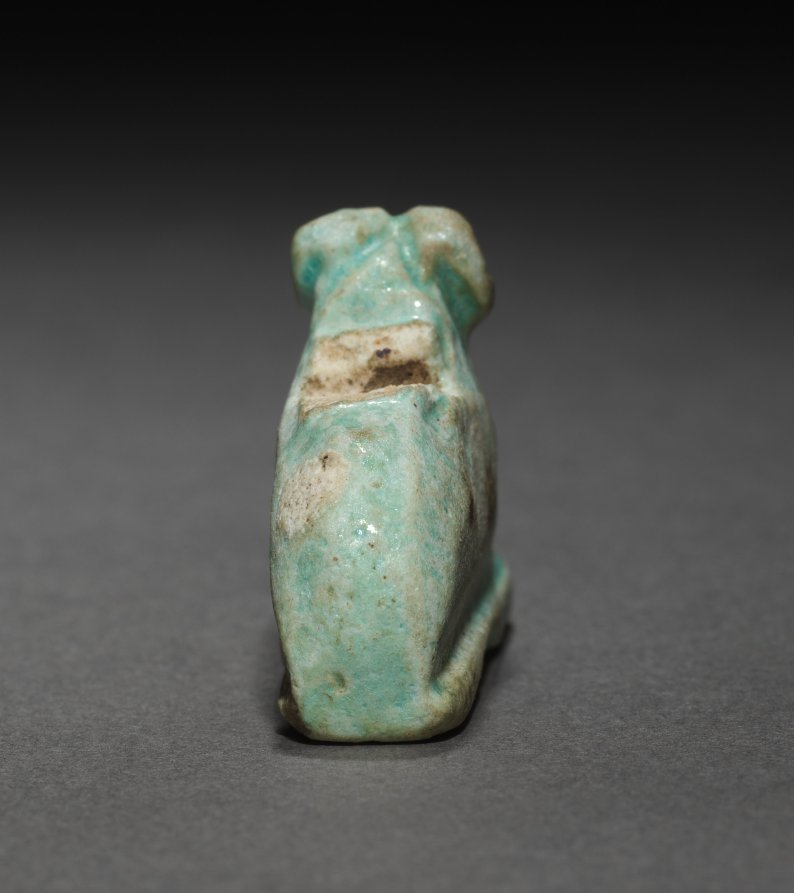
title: Ram Amulet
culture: Egypt, Greco-Roman period (332 BCE–395 CE), Ptolemaic dynasty (305–30 BCE)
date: 305–30 BCE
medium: light robin's egg blue faience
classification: Amulets